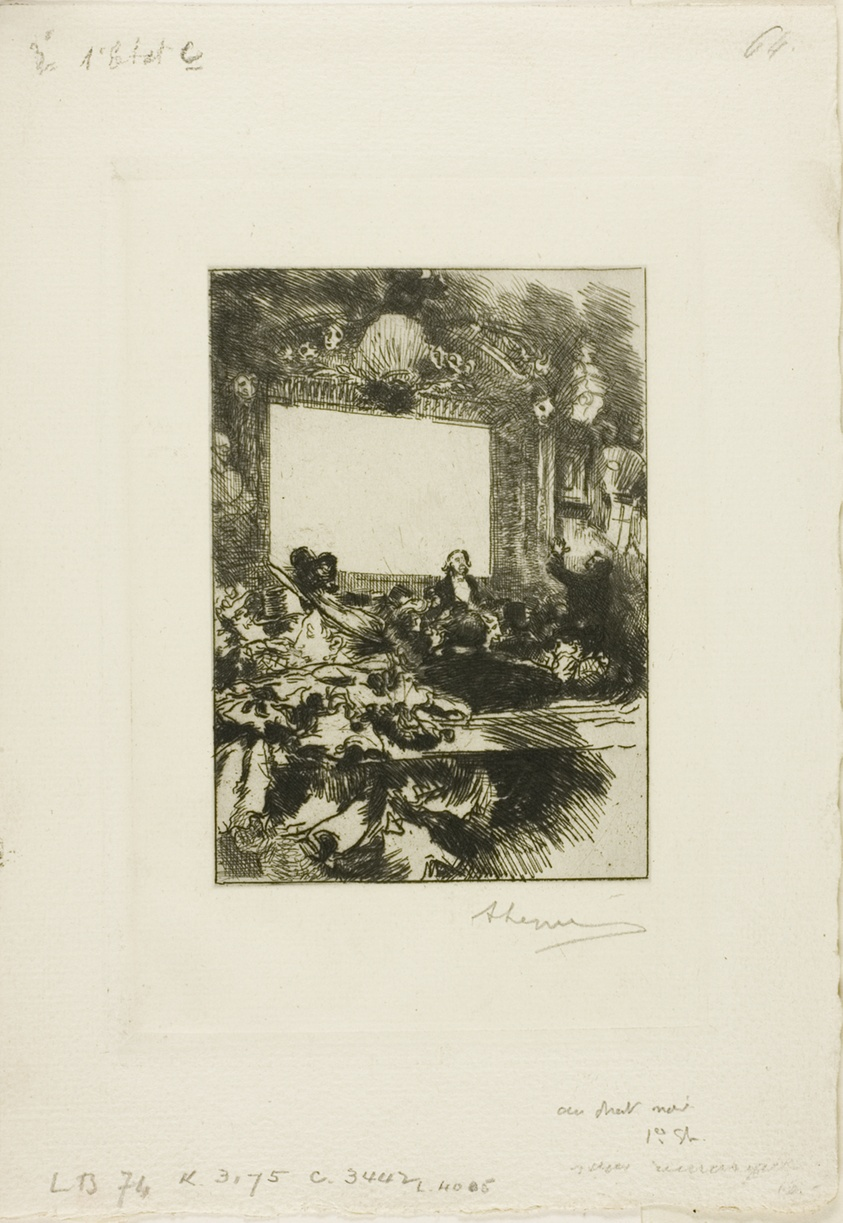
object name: Print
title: At the Chat Noir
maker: Louis Auguste Lepère (French, 1849-1918)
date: 1893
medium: Etching and aquatint on cream laid paper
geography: France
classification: etching; print; prints and drawing